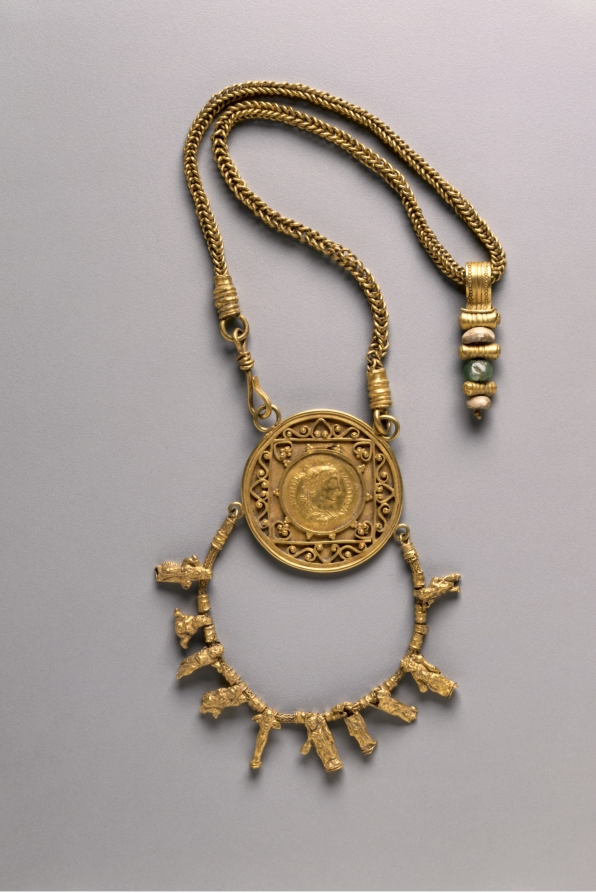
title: Collar with Medallion and Pendant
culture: Egypt, Alexandria, Roman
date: Collar: c. 200–300 CE, Coin: c. 177 CE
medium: gold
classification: Jewelry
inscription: "L. AUREL. COM.MODUS AVG."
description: This necklace is an amalgamation of several different pieces. A thick gold chain is attached to a central medallion, which holds a coin of the Roman emperor Commodus in its center, possibly an ancient replica. A second pendant chain is attached to the bottom of the medallion, strung with ten tiny amulets representing figures of gods, goddesses, and theatrical actors.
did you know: The undamaged pendant figures include, among others, Baubo, Serapis, Isis-Demeter, and a dwarf (perhaps a comic actor).